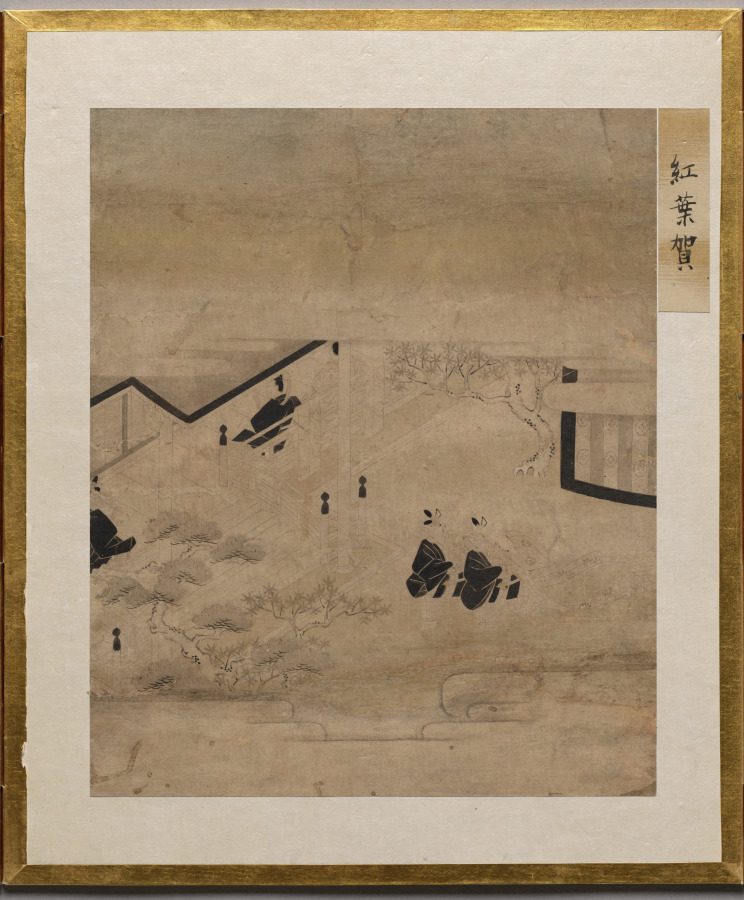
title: Autumn Excursion from Album of Illustrations for the Tale of Genji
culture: Japan, Edo period (1615–1868)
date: 1600s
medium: painting in an accordion-style album; ink, light color, and gold on paper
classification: Bound Volume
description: This album contains illustrations for the classic literary work the Tale of Genji, authored in the 1000s by Murasaki Shikibu, an aristocrat of the Heian period (794–1185) court. The scenes are painted in the “white drawing” (hakubyō) mode, in which a fine ink line is used to depict figures and spaces with great subtlety, punctuated only occasionally by traces of red pigment for a character’s lips, a detail of a garment, or a decorative element. These two scenes illustrate episodes from the chapters “Thin Veil of Cloud” (Usugumo) and “Barrier Gate” (Sekiya).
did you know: The illustrations are identified by chapter title in cartouches to the upper right of the paintings.